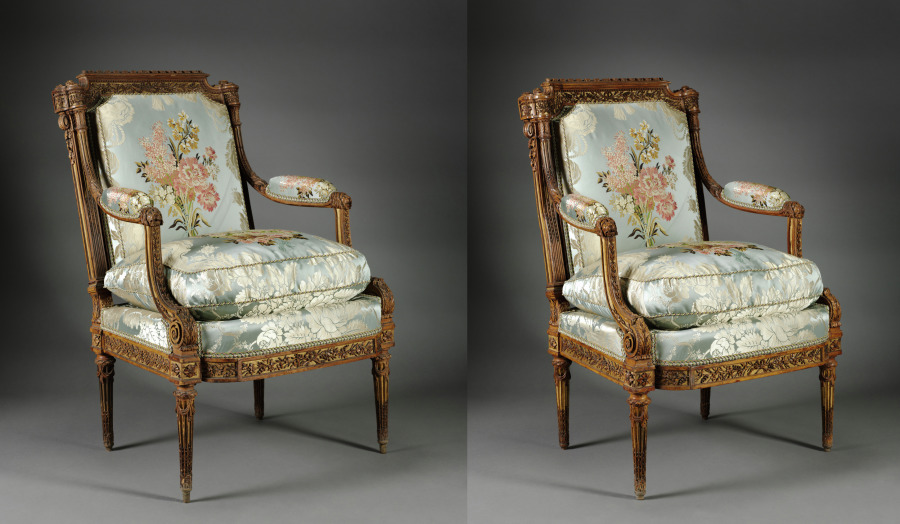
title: Pair of Armchairs (Fauteuil)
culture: France, 18th century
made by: Nicolas-Denis Delaisement (French)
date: c. 1785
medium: boxwood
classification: Furniture and woodwork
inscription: signed on back of frame of seat underneath: Delaisement with inverted "s."